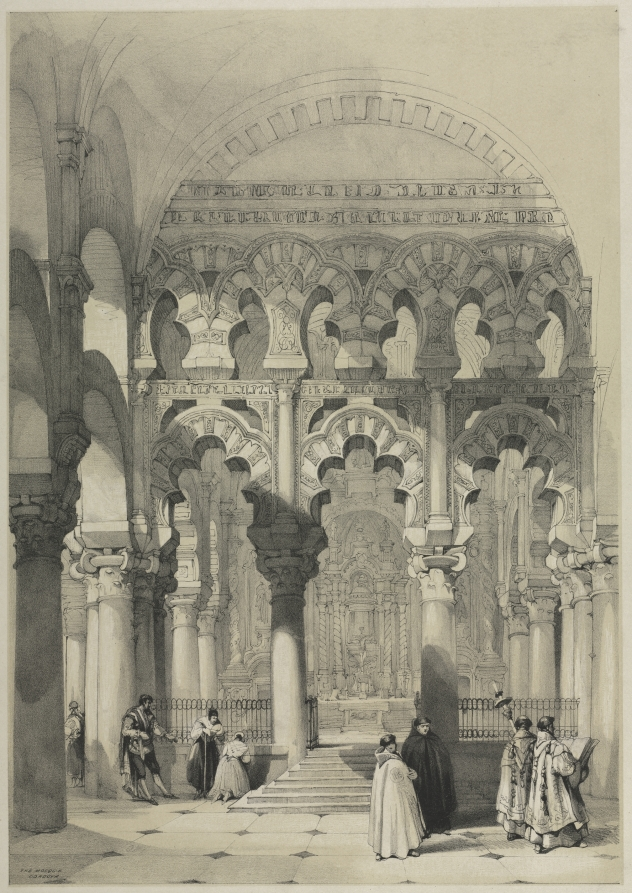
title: The Mosque, Córdoba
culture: England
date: 1800s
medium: lithograph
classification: Print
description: This print shows the Mosque of Córdoba, in Andalusia, southern Spain, being used as a Catholic cathedral. The site was used as a mosque from 785 through 1236 when it was converted into a cathedral under the Christian kingdom of Castile. Today the building includes both Islamic and Christian architectural elements. The scalloped archway recalls the period in which the Moors, a Muslim cultural group, ruled parts of Spain and Portugal. An altar with a crucifix is visible, and the Christogram IHS (an abbreviation of the first three letters of Jesus’s name in Greek) can be seen on one priest’s shoulder.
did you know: The Mosque-Cathedral of Córdoba is designated as a UNESCO World Heritage Site.